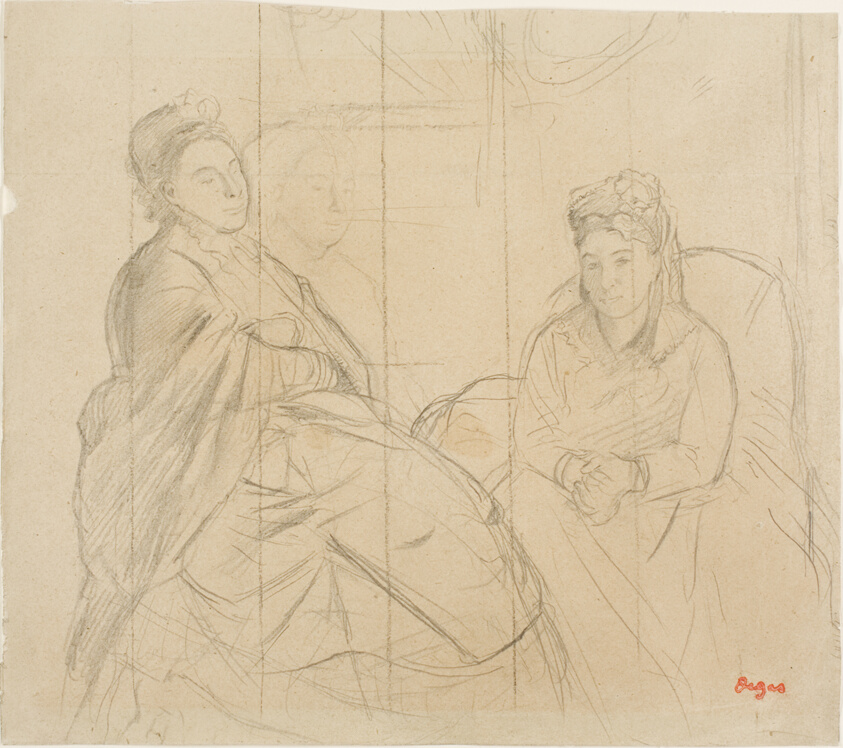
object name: Drawing and Watercolor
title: Madame Lisle and Madame Loubens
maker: Edgar Degas; French, 1834-1917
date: 1869/72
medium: Graphite on tan wove paper, squared in black crayon, laid down on cream Japanese paper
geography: France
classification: graphite; drawings (visual works); prints and drawing; paper